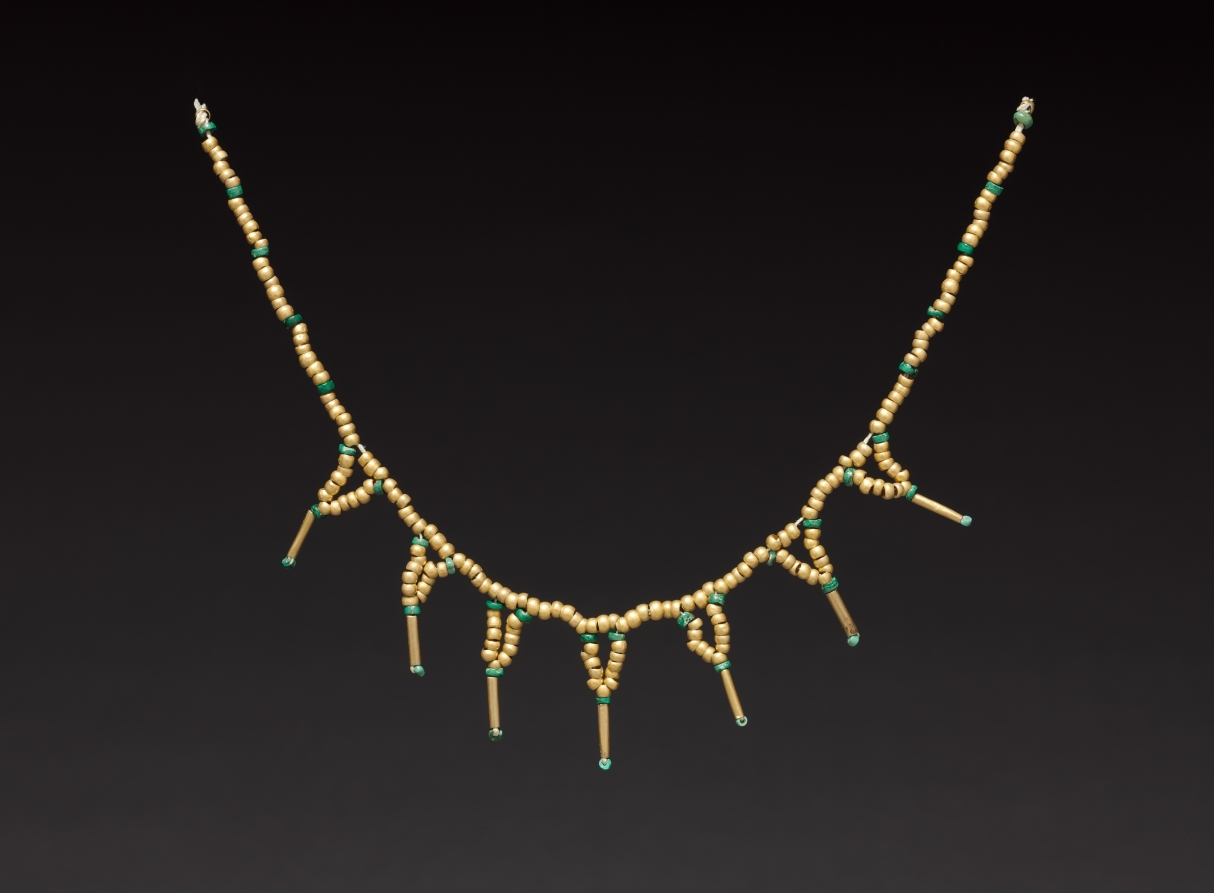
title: Beads Strung as a Necklace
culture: Central Panama, (Sitio Conte?), Conte Style, 5th century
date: c. 400–500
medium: gold and turquoise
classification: Jewelry